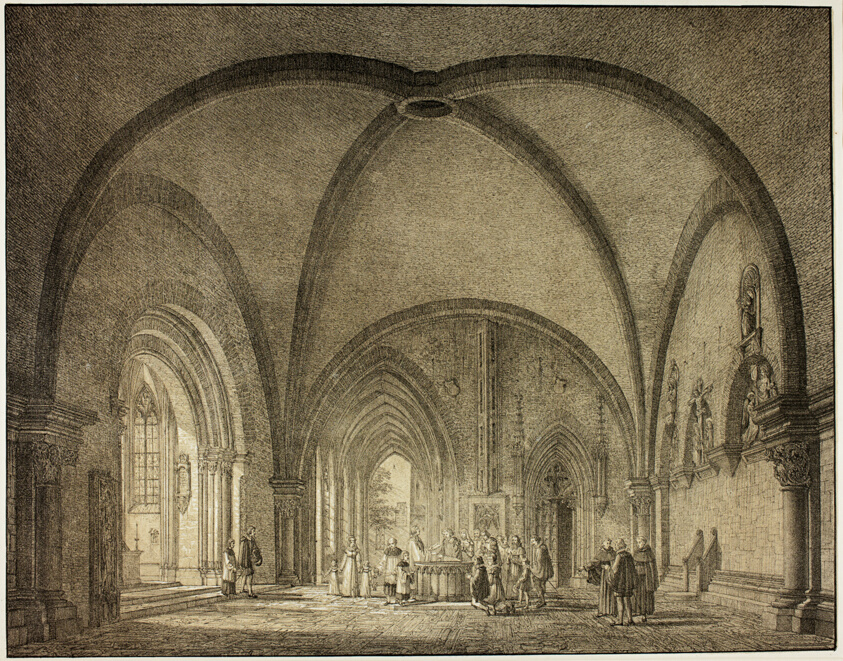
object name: Print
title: Baptismal Hall and Cloisters in the Cathedral at Mainz, from Collection of Memorable Medieval Buildings in Germany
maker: Domenico Quaglio II; German, 1787-1837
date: 1823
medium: Lithograph in black, with tint stone in beige, on ivory wove paper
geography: Germany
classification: lithograph; print; prints and drawing